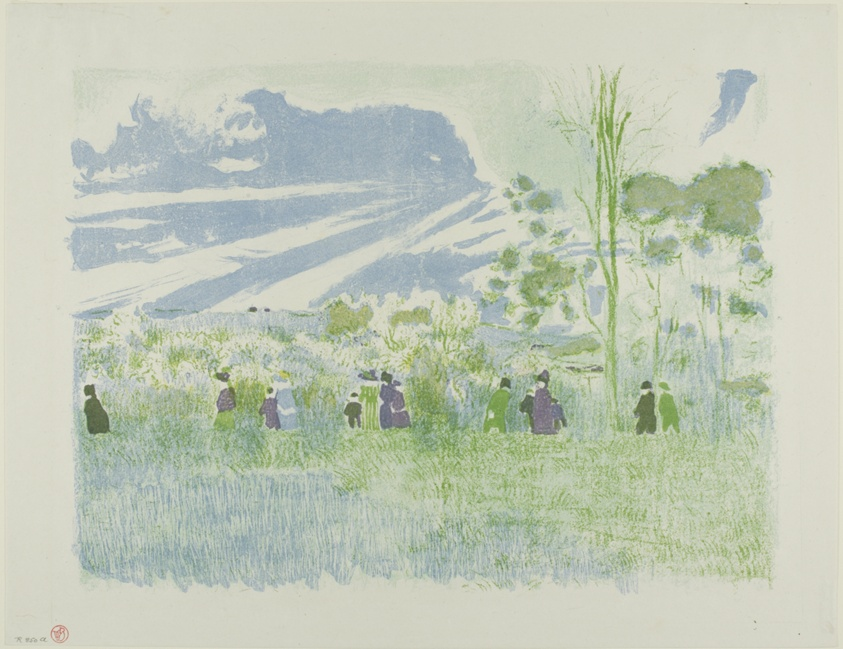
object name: Print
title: Across the Fields, plate three from Landscapes and Interiors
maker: Edouard Jean Vuillard (French, 1868-1940); printed by Auguste Clot (French, 1858-1936); published by Ambroise Vollard (French, 1867-1939)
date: 1899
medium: Color lithograph on grayish-ivory China paper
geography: France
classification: lithograph; print; prints and drawing